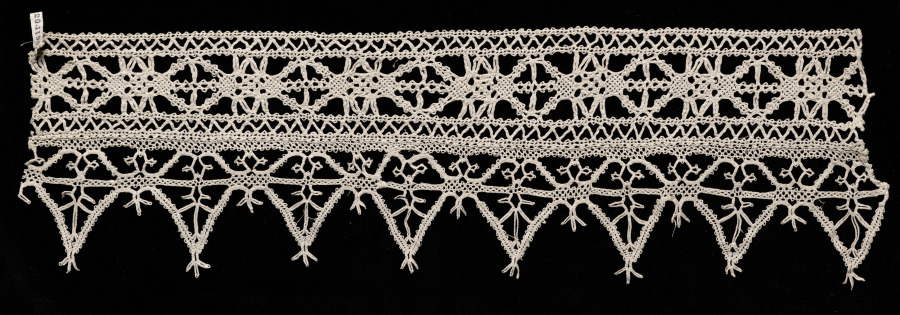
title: Lace Insertion and Edging of Points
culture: Italy, Venice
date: 1500s–1600s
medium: Bobbin lace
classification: Lace